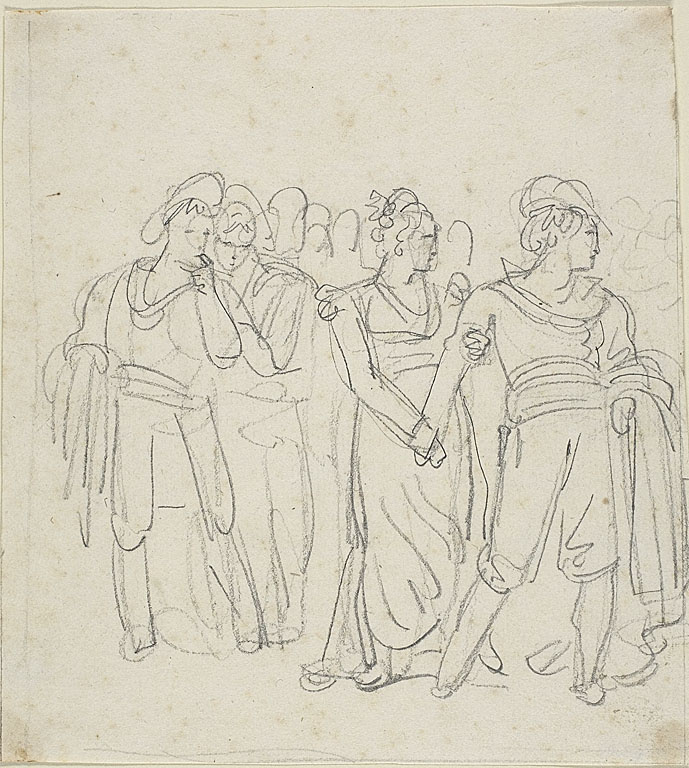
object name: Drawing and Watercolor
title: Brigand Chief Held Back By a Woman (recto); Sketch fo Two Figures in a Landscape (verso)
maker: Bartolomeo Pinelli (Italian, 1781-1835)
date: 1801/35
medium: Graphite (recto and verso) on ivory laid paper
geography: Italy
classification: graphite; drawings (visual works); prints and drawing